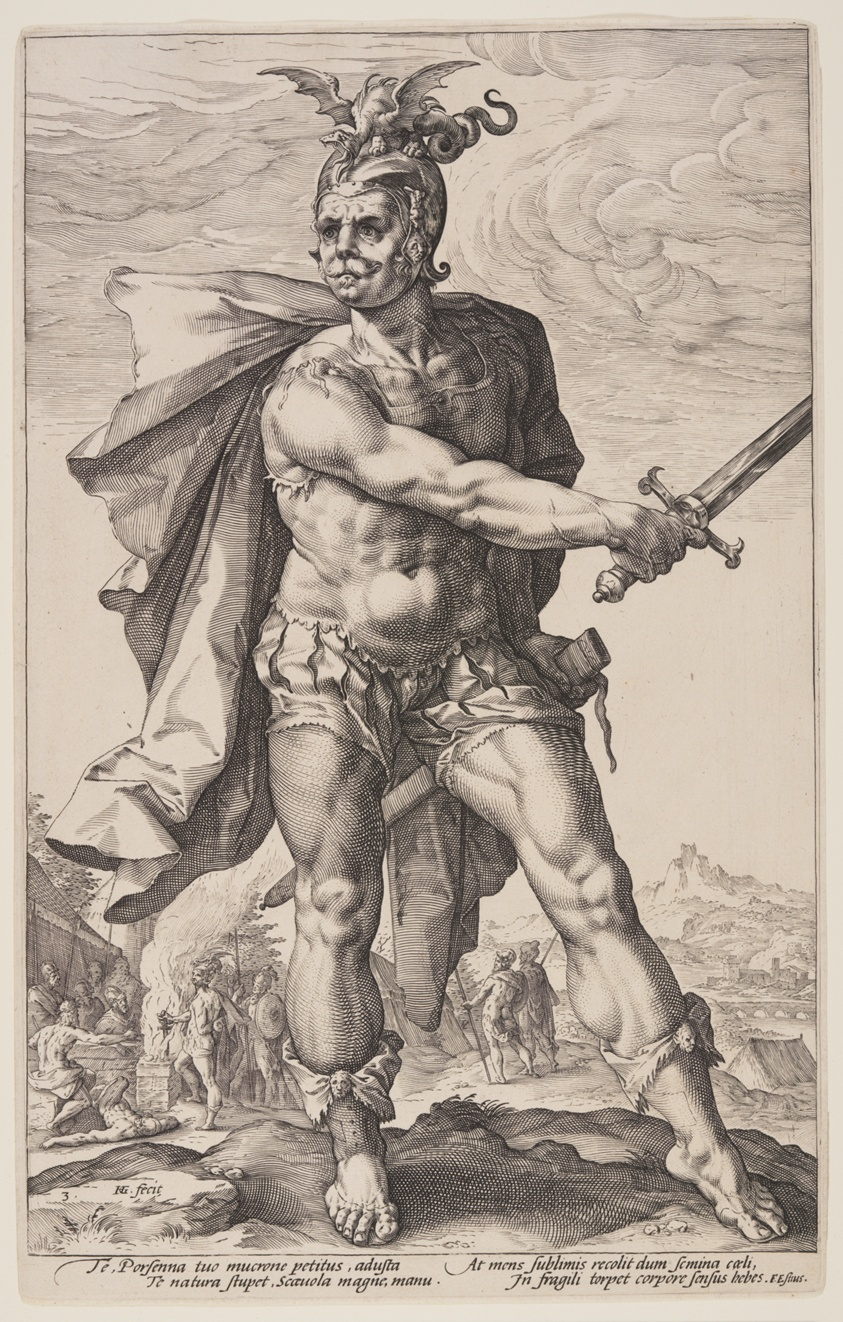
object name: Print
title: Mucius Scaevola, from The Roman Heroes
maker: Hendrick Goltzius (Dutch, 1558–1617)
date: 1586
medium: Engraving on ivory laid paper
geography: Netherlands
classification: print; paper; prints and drawing; engraving